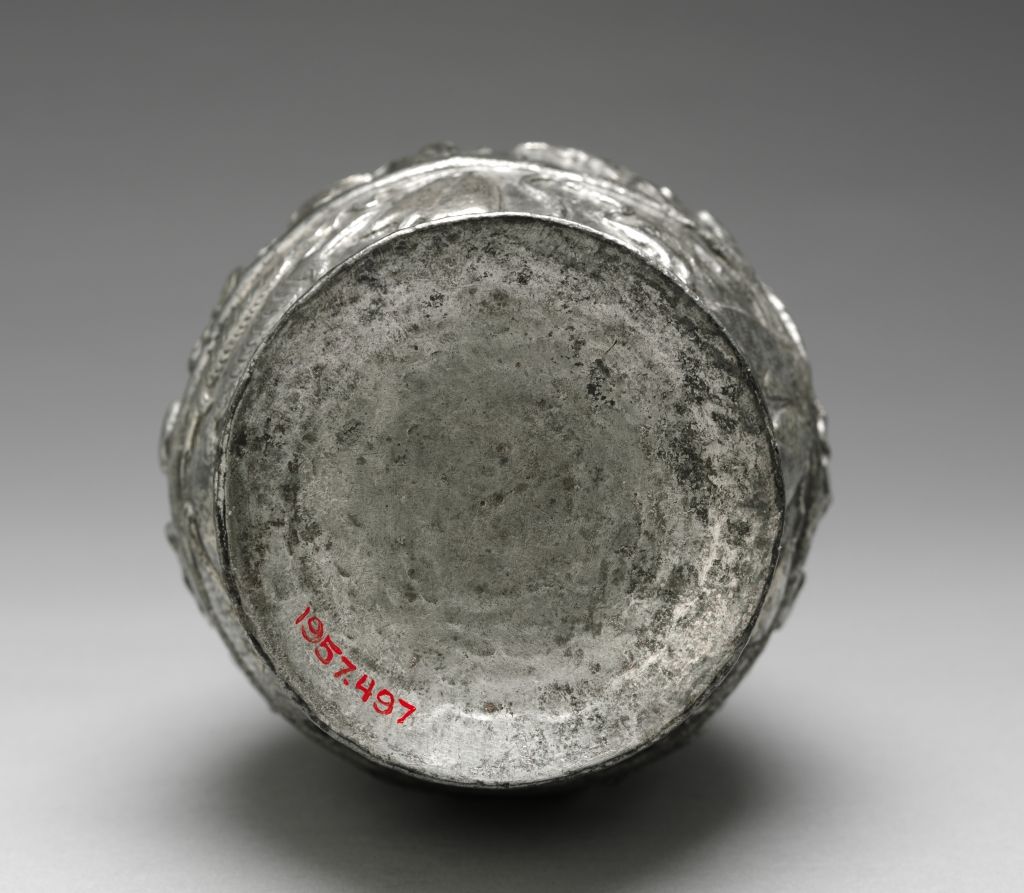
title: Ewer (Pitcher) with Game, Seafood, and Wine Scenes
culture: Byzantium, Syria(?), Byzantine period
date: late 300s CE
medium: silver with traces of gilding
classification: Metalwork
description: This magnificent pitcher, called a ewer, was almost certainly meant for serving wine in the dining room of a wealthy home. On its surface are images in three bands representing the expected bounty of the hunt. Deer pursued by a lioness and hares chased by dogs appear in the top band, signifying the wealth of game the owner hoped to have on the family table. In the lowest band are edible sea creatures, while the center features the merry followers of the Roman wine god Bacchus (Dionysos in Greek).